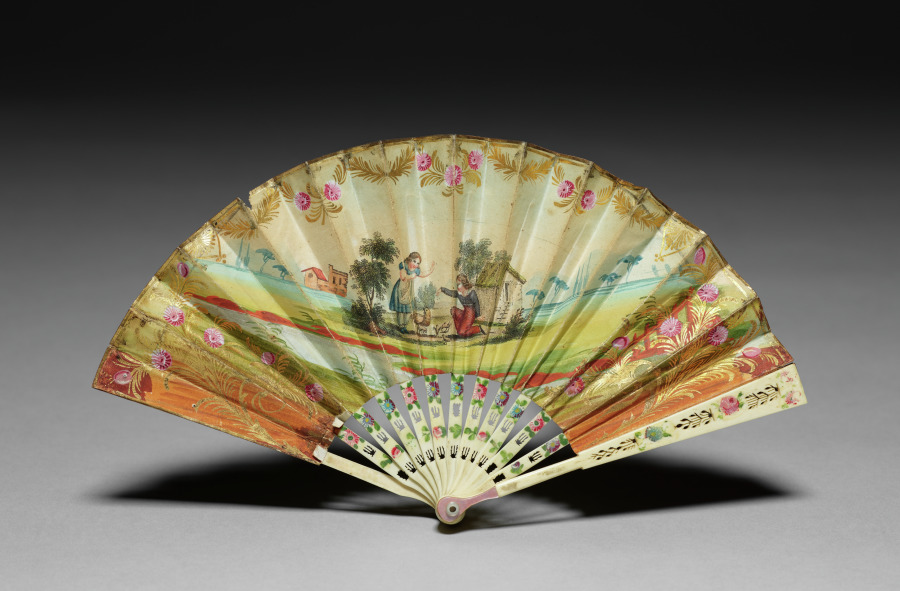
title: Child's Fan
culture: France, late 18th or early 19th century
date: late 1700s or early 1800s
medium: bone, mother-of-pearl, gilt and painted paper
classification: Miscellaneous